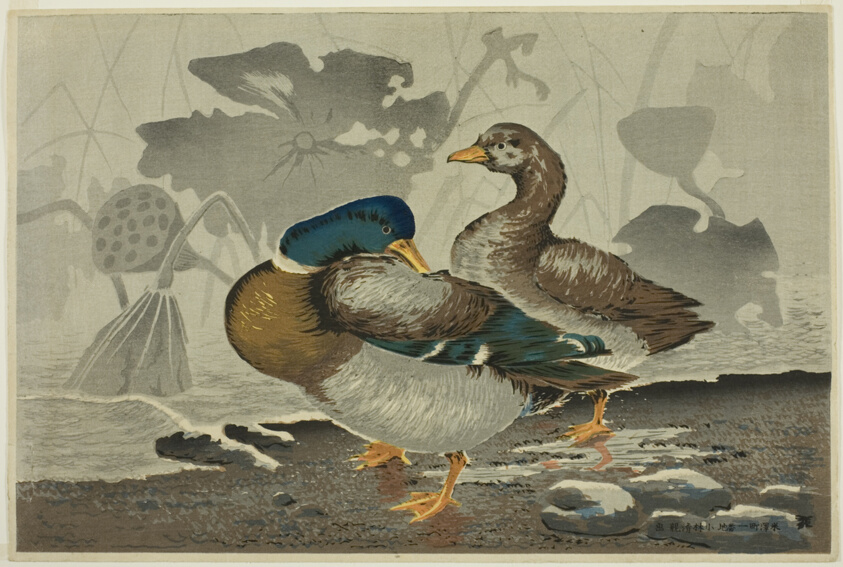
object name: Print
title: A pair of ducks by a lotus pond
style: Japanese (culture or style)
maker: Kobayashi Kiyochika (Japanese, 1847-1915)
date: 1879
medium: Color woodblock print; oban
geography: Japan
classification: woodblock print; print; asian art